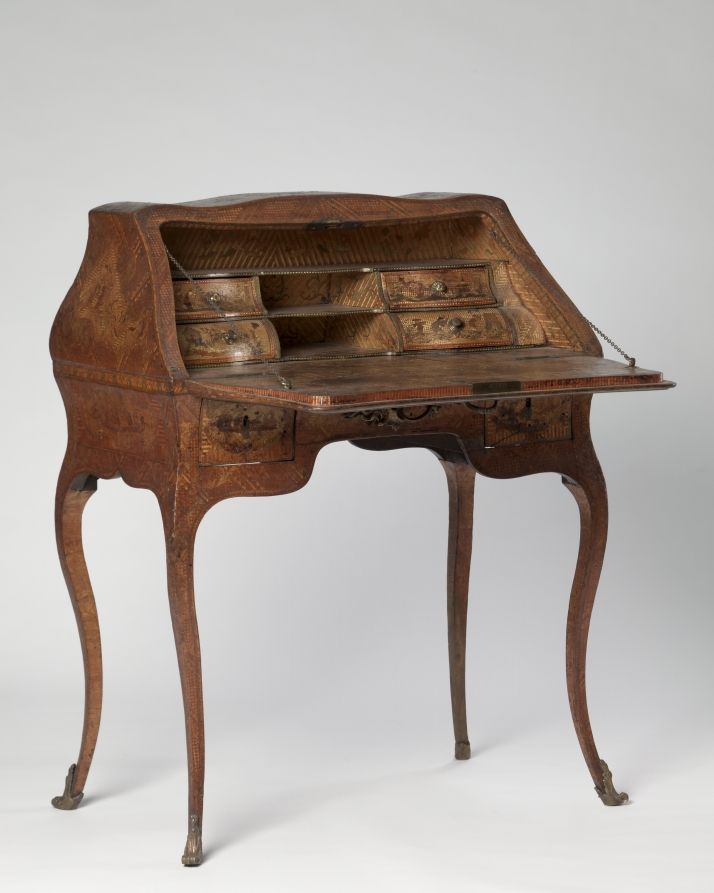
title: Ladies Writing Desk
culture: Possibly Northern Italy, near France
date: c. 1750–75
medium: Oak with straw marquetry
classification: Furniture and woodwork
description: As early as the beginning of the 17th century, straw marquetry was being produced throughout Europe. Along with cabinetmakers and specialized artisans, creators of straw marquetry included home artisans, nuns, monks, and noble dilettantes. Thus the quality and design of objects using straw marquetry is quite diverse. While some pieces appear nearly naive, others are made very masterfully, such as with this ladies writing desk. Some of these objects were even presented in royal cabinets of wonder. Because of its silky gloss and bright colors, straw marquetry was held in great esteem as unusual and remarkable decoration for furniture and other objects on par with gemstones, tortoiseshell, or ivory.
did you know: The surface of this ladies writing desk is completely covered with straw marquetry decoration both outside and in.